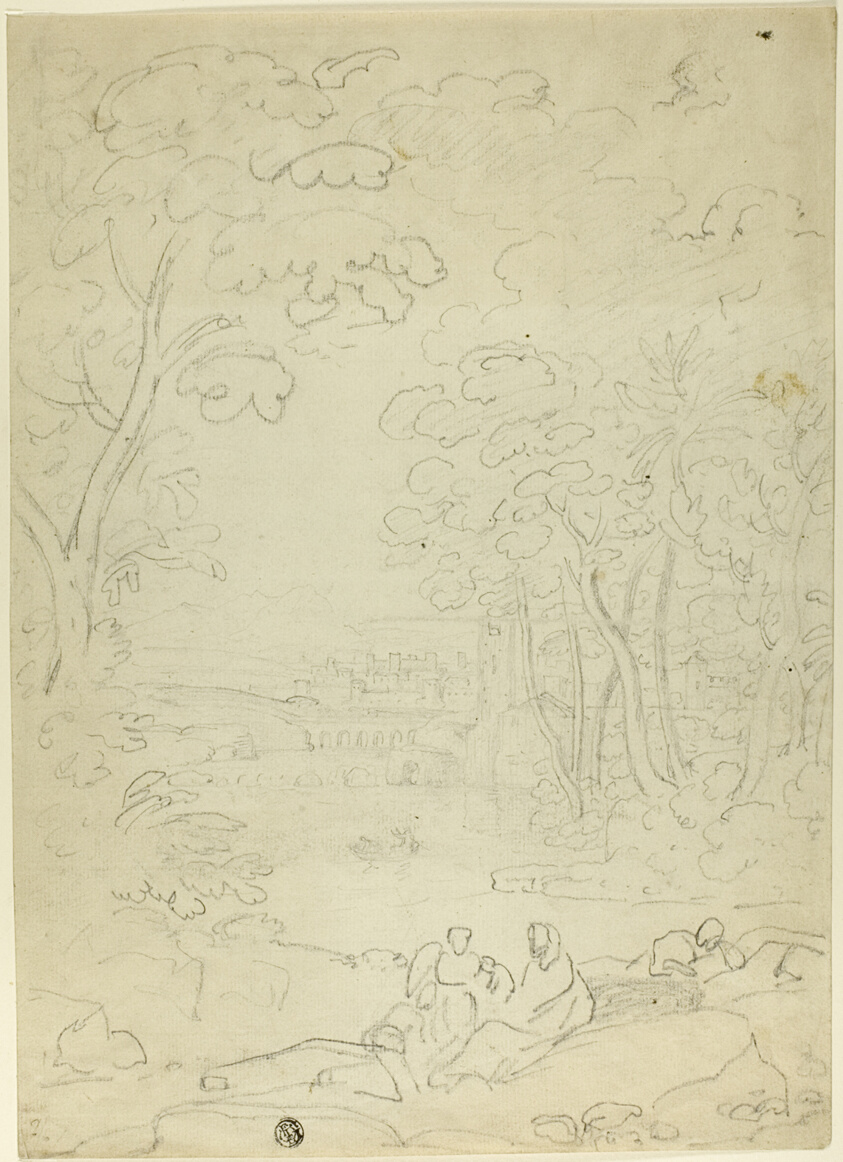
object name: Drawing and Watercolor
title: Rest on the Flight into Egypt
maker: Attributed to Richard Wilson (English, 1714-1782); or after Claude Lorrain (French, 1600-1682)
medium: Graphite on ivory laid paper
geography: England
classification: chalk; drawings (visual works); prints and drawing